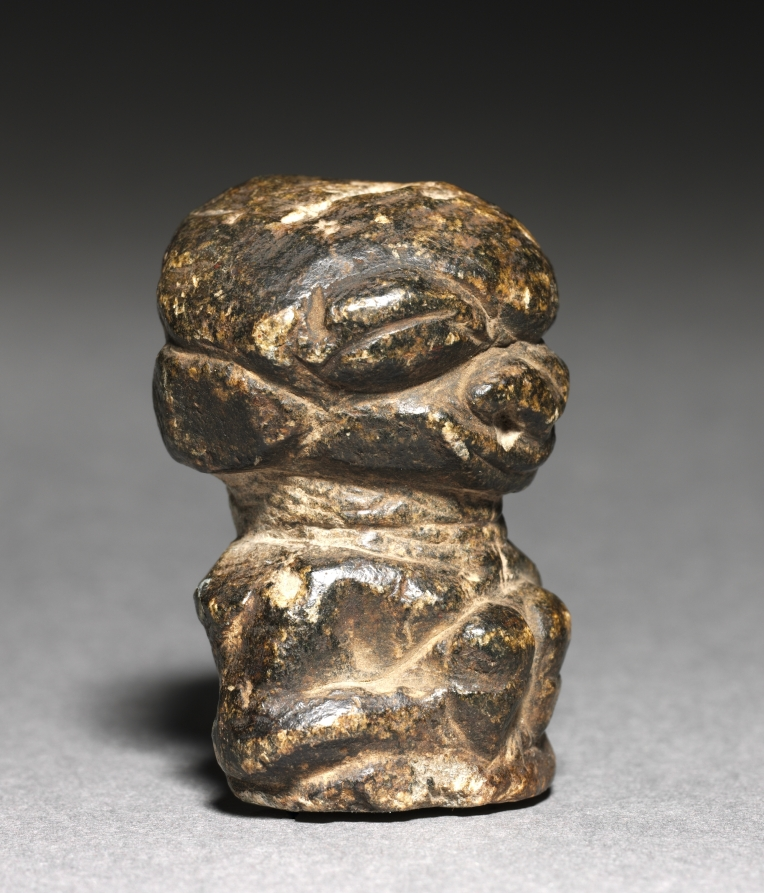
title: Female Figure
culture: Africa, West Africa, Sierra Leone, Sherbro Island, unknown maker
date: 1500s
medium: soapstone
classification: Sculpture